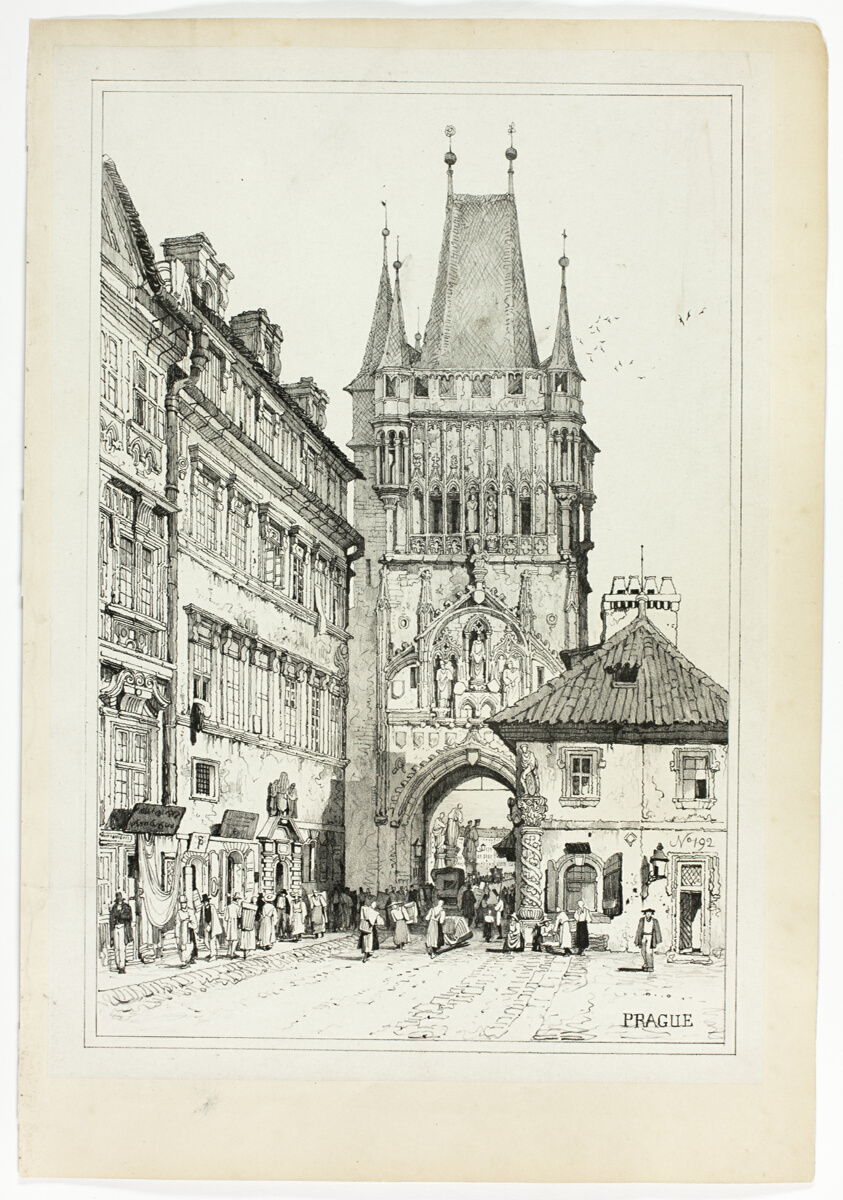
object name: Print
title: Prague, from Facsimiles of Sketches made in Flanders and Germany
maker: Samuel Prout (English, 1783-1852); printed by Charles Joseph Hullmandel (English, 1789-1850)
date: 1833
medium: Lithograph in black on grayish-ivory chine, laid down on ivory wove paper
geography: England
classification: lithograph; print; prints and drawing